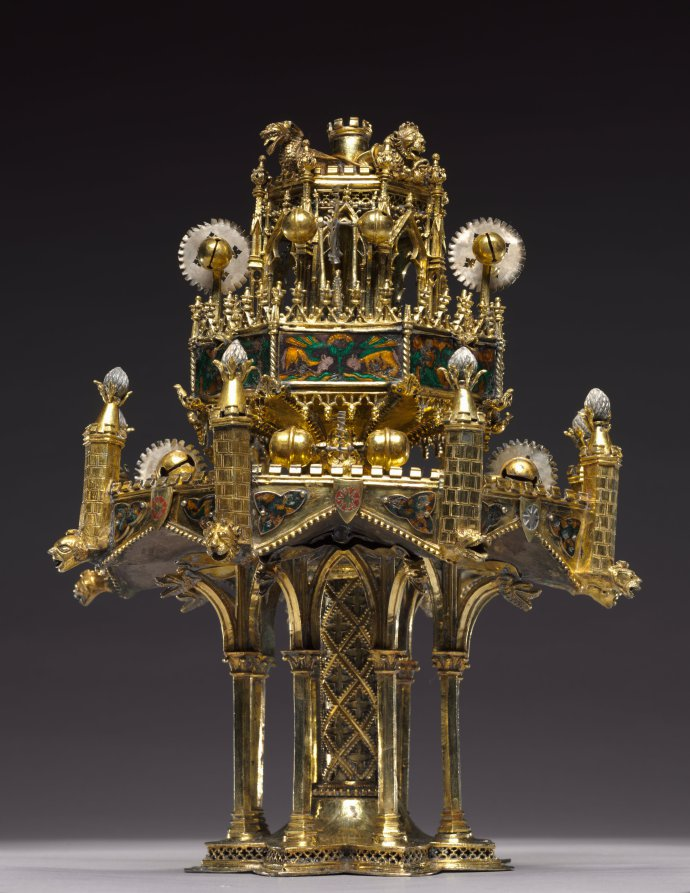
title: Table Fountain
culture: France, Paris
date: c. 1320–40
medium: gilt-silver and translucent enamels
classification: Metalwork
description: Conceptually and stylistically, this object is beyond all else a piece of Gothic architecture in miniature with vaults, pinnacles, columns, and traceried arches. Though the artist who created it is unknown, he was unquestionably inspired by the great Gothic buildings of his time. The table fountain is a three-tiered assembly combining cast elements with bent sheets of gilt-silver. To these have been attached a series of enamel plaques representing grotesque figures, some of which play musical instruments. Water wheels and bells were added to capture motion and sound. The rich detail, precious materials, and involved ornamentation of this deluxe object suggest it would have been expensive to produce and highly treasured by its original owner, someone of high status, and would have been deployed as an object of spectacle. This is the most complete example of its type known to survive from the Middle Ages. Medieval inventories reveal that small fountains like this, often taking various forms, and generally made from precious metals, once existed in large numbers, thus making the Cleveland table fountain an extremely rare object.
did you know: This fountain with its minute architectural details and finely made enamel plaques displayed the wealth and refinement of the owner as it entertained his guests. Imagine hearing the ringing of the tiny bells when this fountain was in use.